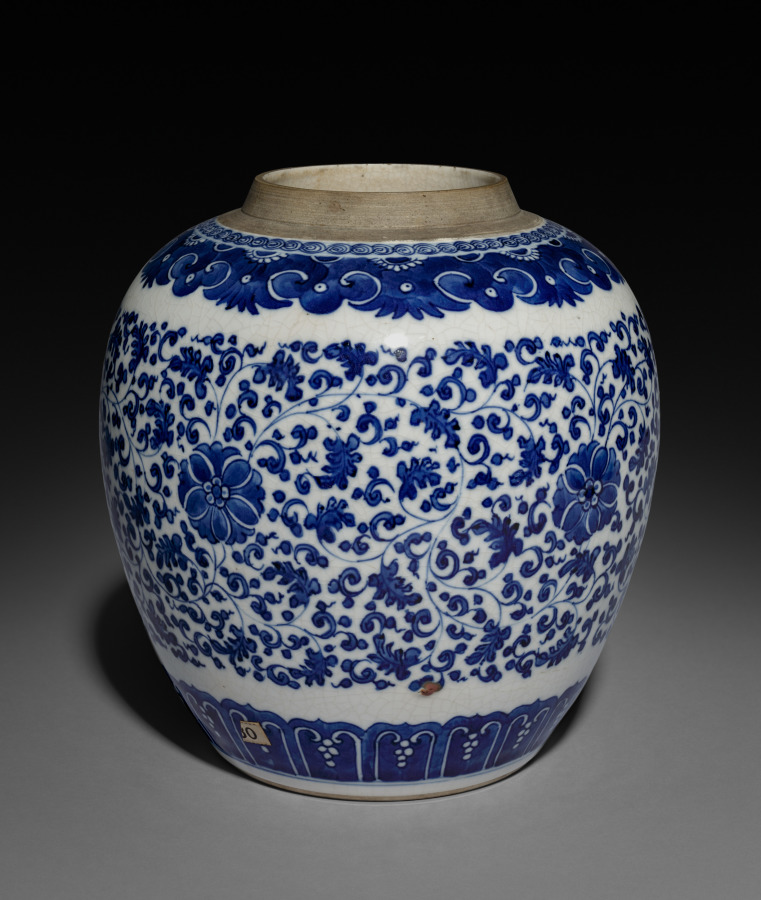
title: Ginger Jar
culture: China, Qing dynasty (1644–1911), Qianlong reign (1736–95)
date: 1736–95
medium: porcelain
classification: Ceramic